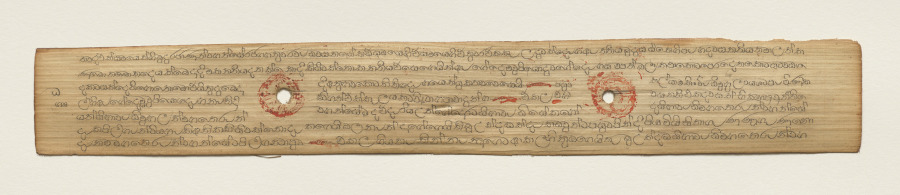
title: Leaf from a Buddhist Manuscript (recto)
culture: Sri Lanka, Singhalese, Late 17th century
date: c. 1700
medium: fiber paper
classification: Manuscript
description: Palm leaf material is still used for manuscripts in Sri Lanka. The palm leaves are prepared first by boiling them, drying them in the sun, and then rubbing them with oils. Scribes then use a metal stylus to incise the text. Then charcoal powder is wiped across the pages, filling in only the inscribed lines.